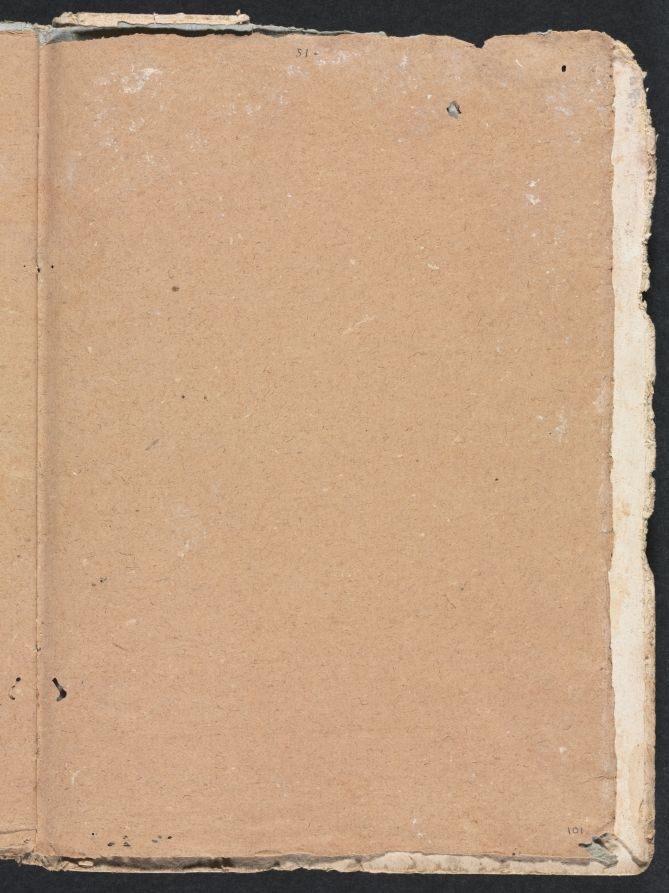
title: Verona Sketchbook: (page 101)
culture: Italy, 18th century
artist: Francesco Lorenzi (Italian, 1723–1787)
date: 1760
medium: paper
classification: Bound Volume